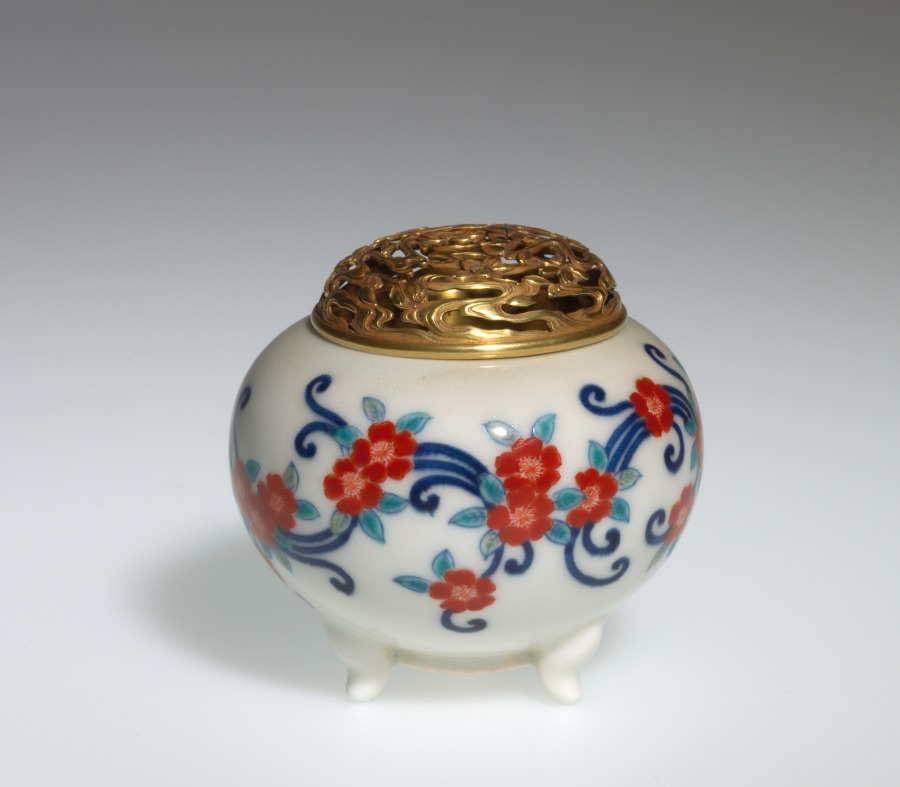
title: Incense Burner with Floral Scroll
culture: Japan, Edo period (1615–1868)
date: early to mid-1800s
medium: Porcelain with underglaze blue and overglaze color enamel (Hizen ware, Nabeshima style)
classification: Ceramic